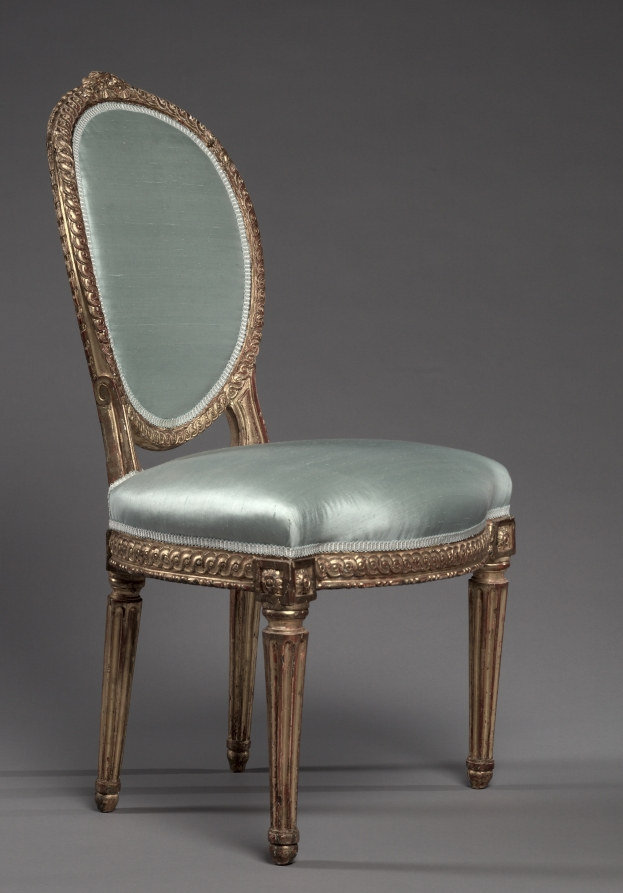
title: Side Chair (1 of 2)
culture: France, style of Louis XVI, 18th century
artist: Jean Baptiste fils Lelarge (French, 1743–1802)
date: 1700s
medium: gilded wood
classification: Furniture and woodwork